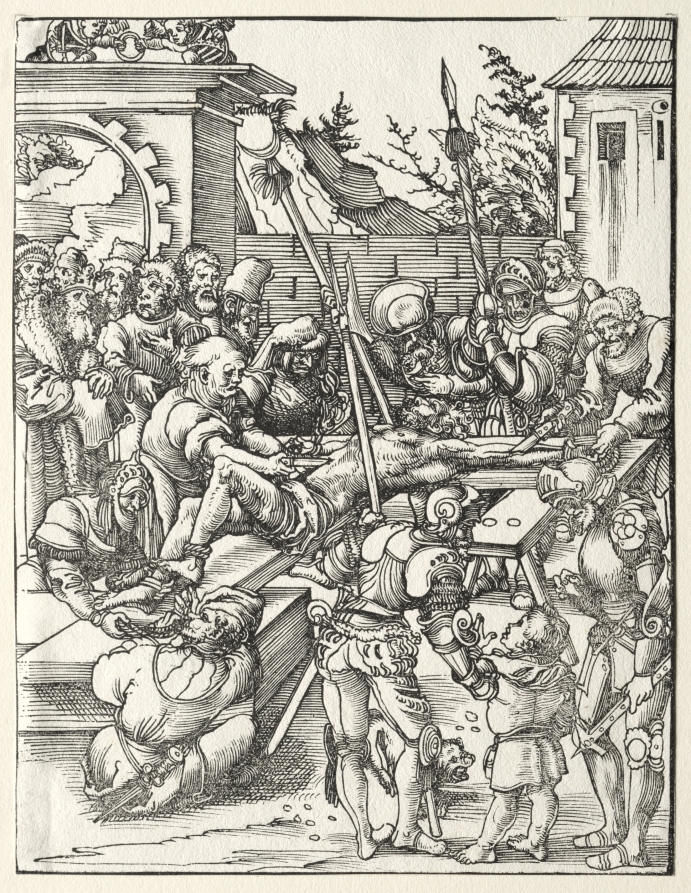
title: Martyrdom of St. Bartholomew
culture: Germany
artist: Lucas Cranach (German, 1472–1553)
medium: woodcut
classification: Print